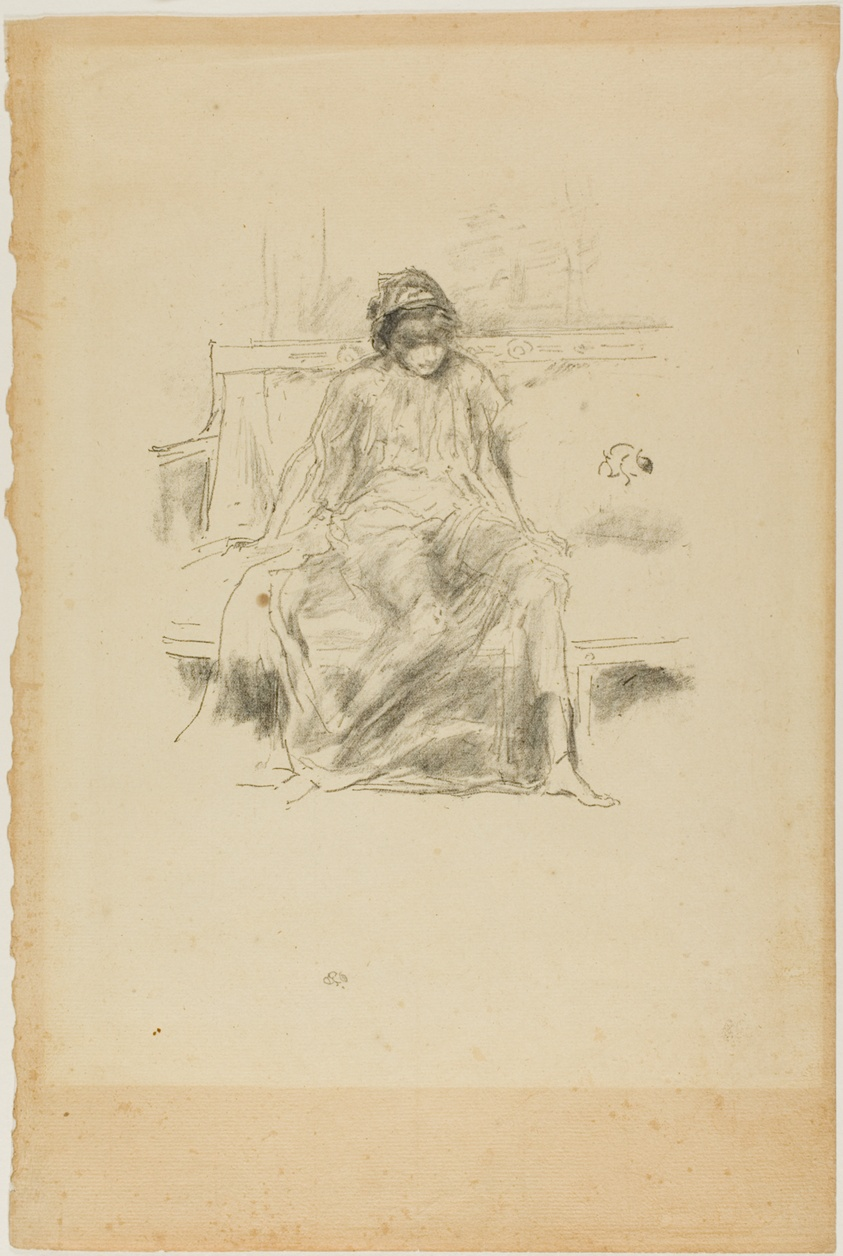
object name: Print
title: The Draped Figure, Seated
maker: James McNeill Whistler (American, 1834-1903)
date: 1893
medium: Transfer lithograph in black with stumping, on cream laid paper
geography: United States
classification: transfer lithograph; lithograph; print; prints and drawing; paper